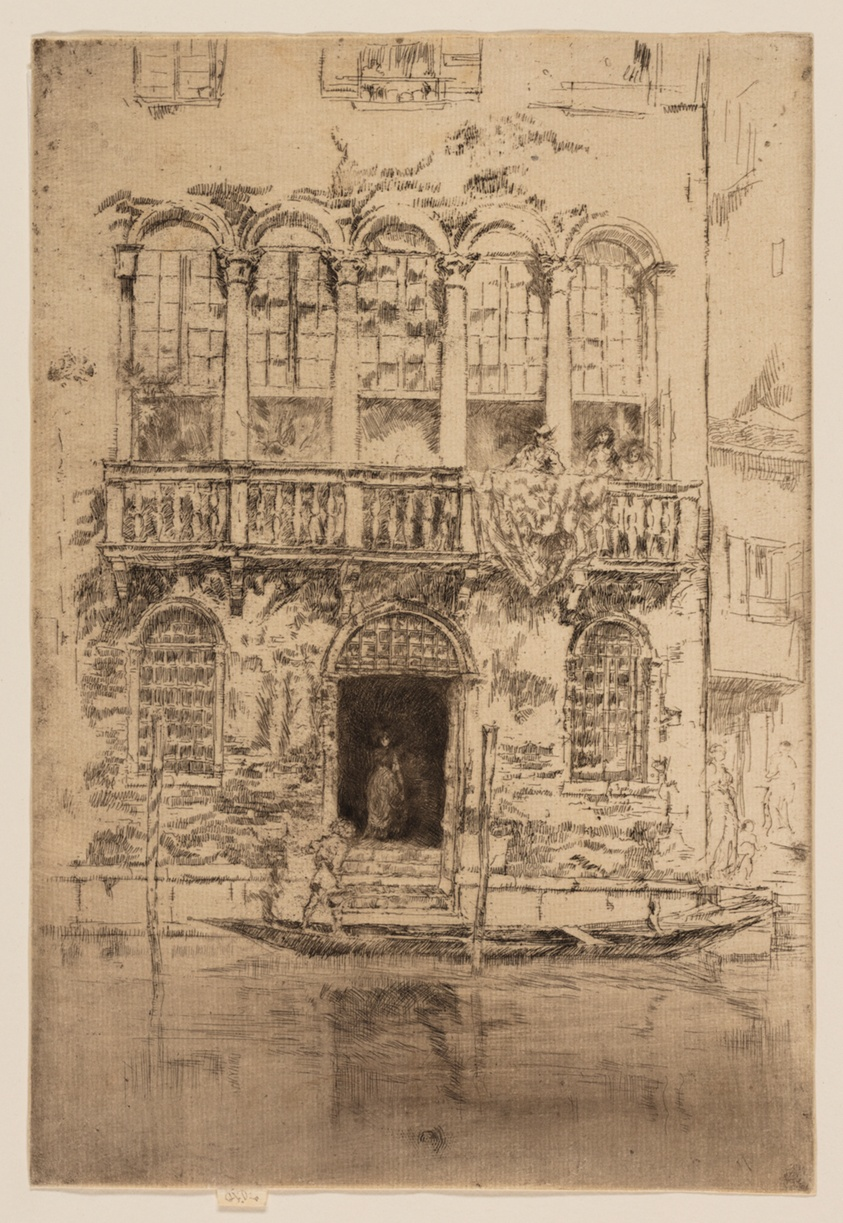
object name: Print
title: The Balcony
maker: James McNeill Whistler (American, 1834-1903)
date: 1879/80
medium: Etching and drypoint with foul biting in dark brown ink on ivory laid paper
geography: United States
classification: etching; foul biting; print; prints and drawing; drypoint; paper